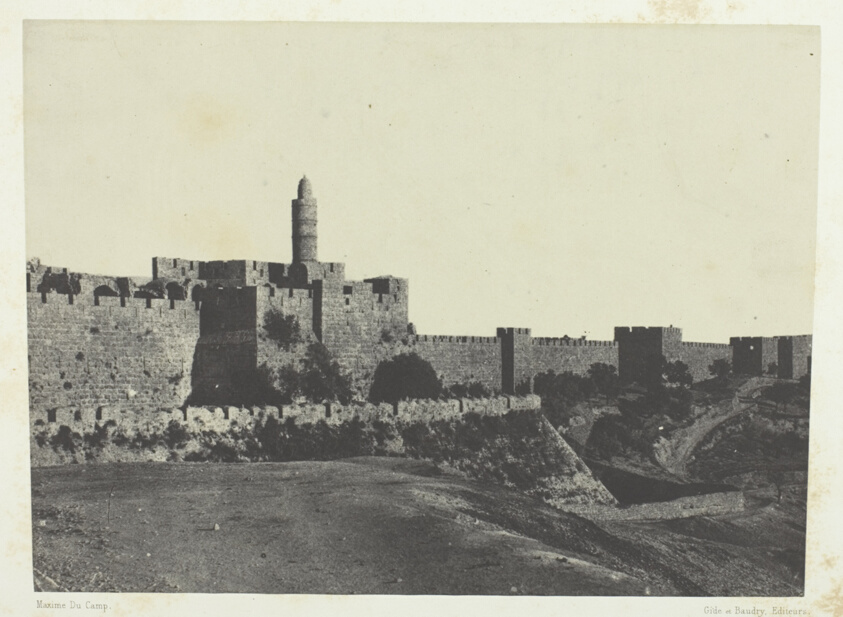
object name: Photograph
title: Jérusalem, Partie Occidentale Des Murailles; Palestine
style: 19th century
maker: Maxime Du Camp (French, 1822–1894)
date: 1849/51, printed 1852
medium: Salted paper print, plate 113 from the album "Egypte, Nubie, Palestine et Syrie" (1852)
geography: France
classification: salted paper print; photographic process; photography; photograph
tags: Collected by Hugh Edwards, Egypte, Nubie, Palestine et Syrie